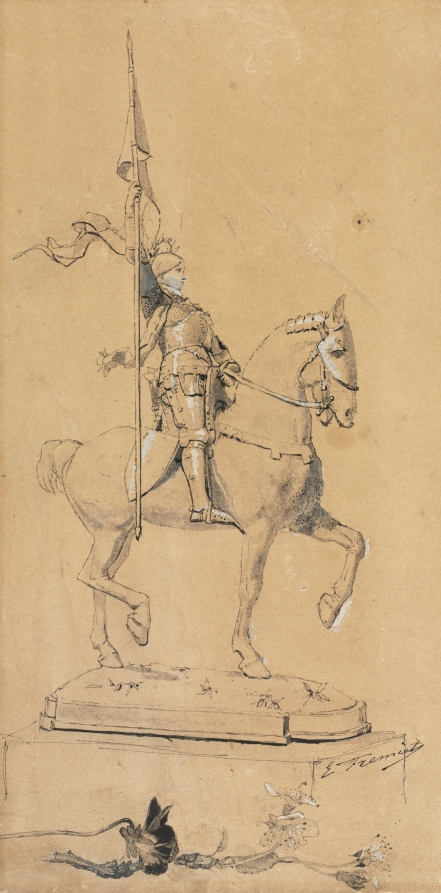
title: Joan of Arc on Horseback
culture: France, 19th century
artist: Emmanuel Fremiet (French, 1824–1910)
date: c. 1889–99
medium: pen and black ink, ink wash and white heightening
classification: Drawing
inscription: inscribed in black ink, lower right: "E. Fremiet"